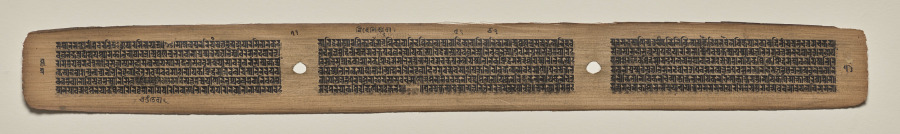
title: Text, Folio 71 (verso), from a Manuscript of the Perfection of Wisdom in Eight Thousand Lines (Ashtasahasrika Prajnaparamita-sutra)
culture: Eastern India, Bihar, Vikramashila Monastery. Painting: Nepal, Kathmandu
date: Sunday, September 14, 1119 (year 239 of the Newar Samvat in the month of Ashvina)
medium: gum tempera and ink on palm leaves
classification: Painting